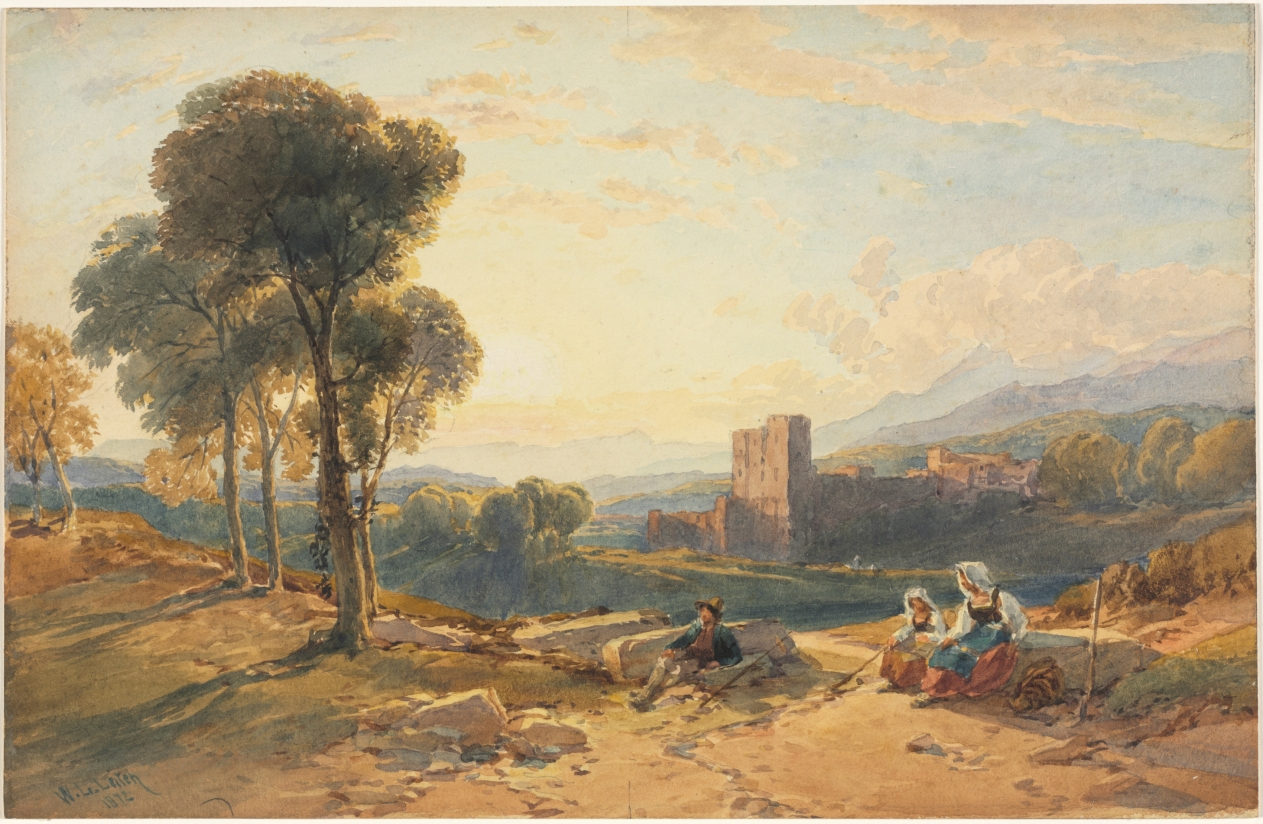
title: Landscape, Italy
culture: England, 19th century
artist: William Leighton Leitch (British, 1804–1883)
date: 1872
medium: watercolor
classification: Drawing